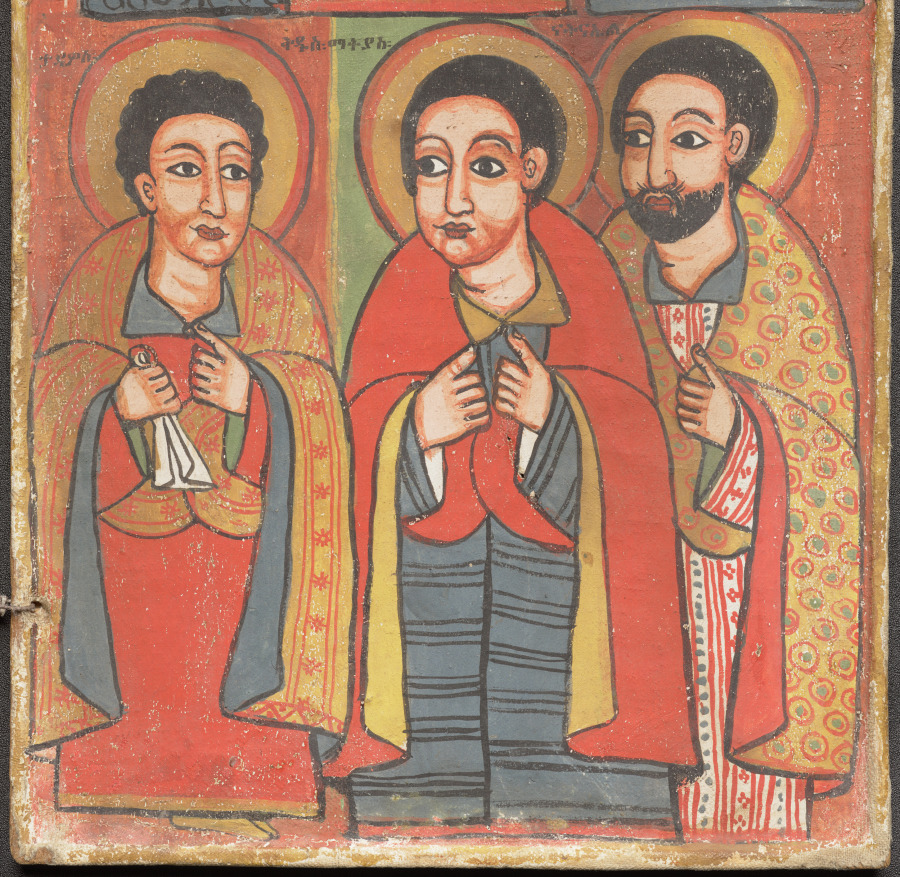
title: Diptych with Twelve Apostles & St. Paul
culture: Africa, East Africa, Ethiopia, presumably Gondär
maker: Workshop or Circle of Wäldä Maryam (Ethiopia, active mid- to late 1600s-early 1700s)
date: c. 1700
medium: Tempera, wood, textile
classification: Painting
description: Depicting 13 holy men, this diptych (two-panel painting) is sized for an Ethiopian Orthodox Christian church or elite home. It is painted in the bold, colorful style associated with royal court workshops from the early 1600s to the mid-1700s. Painter Wäldä Maryam (or someone he trained) set this scene of Christ’s apostles in the context of his homeland. Each saint wears fashionable clothing imported from India. While they are posed and dressed similarly to emphasize their group identity, the artist portrayed their faces and hairstyles individually. Captions in Ge’ez––an eastern African language dating to the 400s BCE––identify each by name.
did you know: Captions written in the language Gəˁəz identify each holy man by name. This African language is nearly 2,500 years old!